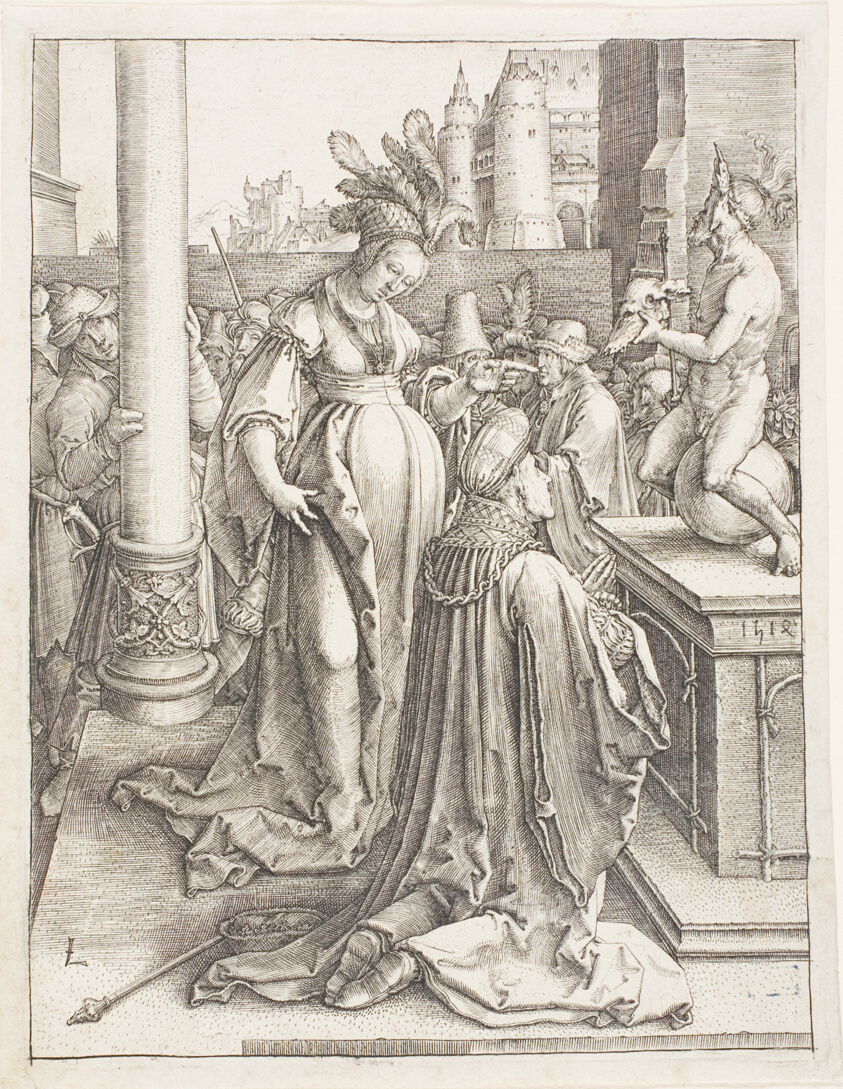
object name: Print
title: Solomon's Idolatry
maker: Lucas van Leyden (Netherlandish, c. 1494-1533)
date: 1514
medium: Engraving in black on ivory laid paper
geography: Netherlands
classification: engraving; print; prints and drawing